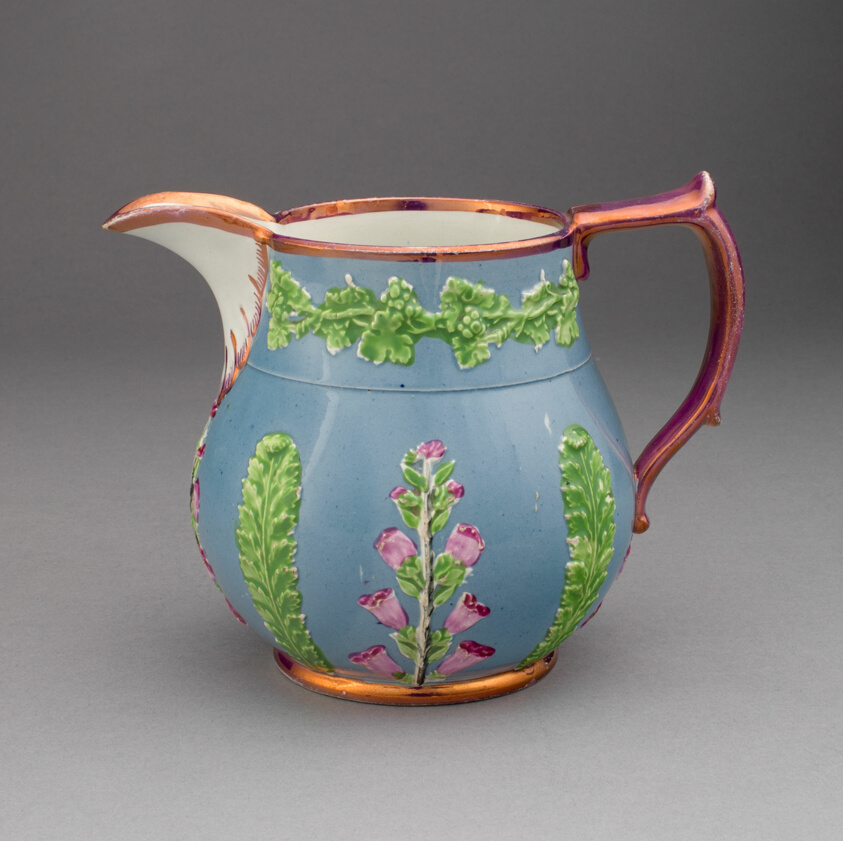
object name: Ceramics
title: Pitcher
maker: England, Staffordshire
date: c. 1830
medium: Lead-glazed earthenware with lustre decoration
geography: Staffordshire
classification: pitcher (vessel); earthenware; vessel; european decorative arts; ceramics